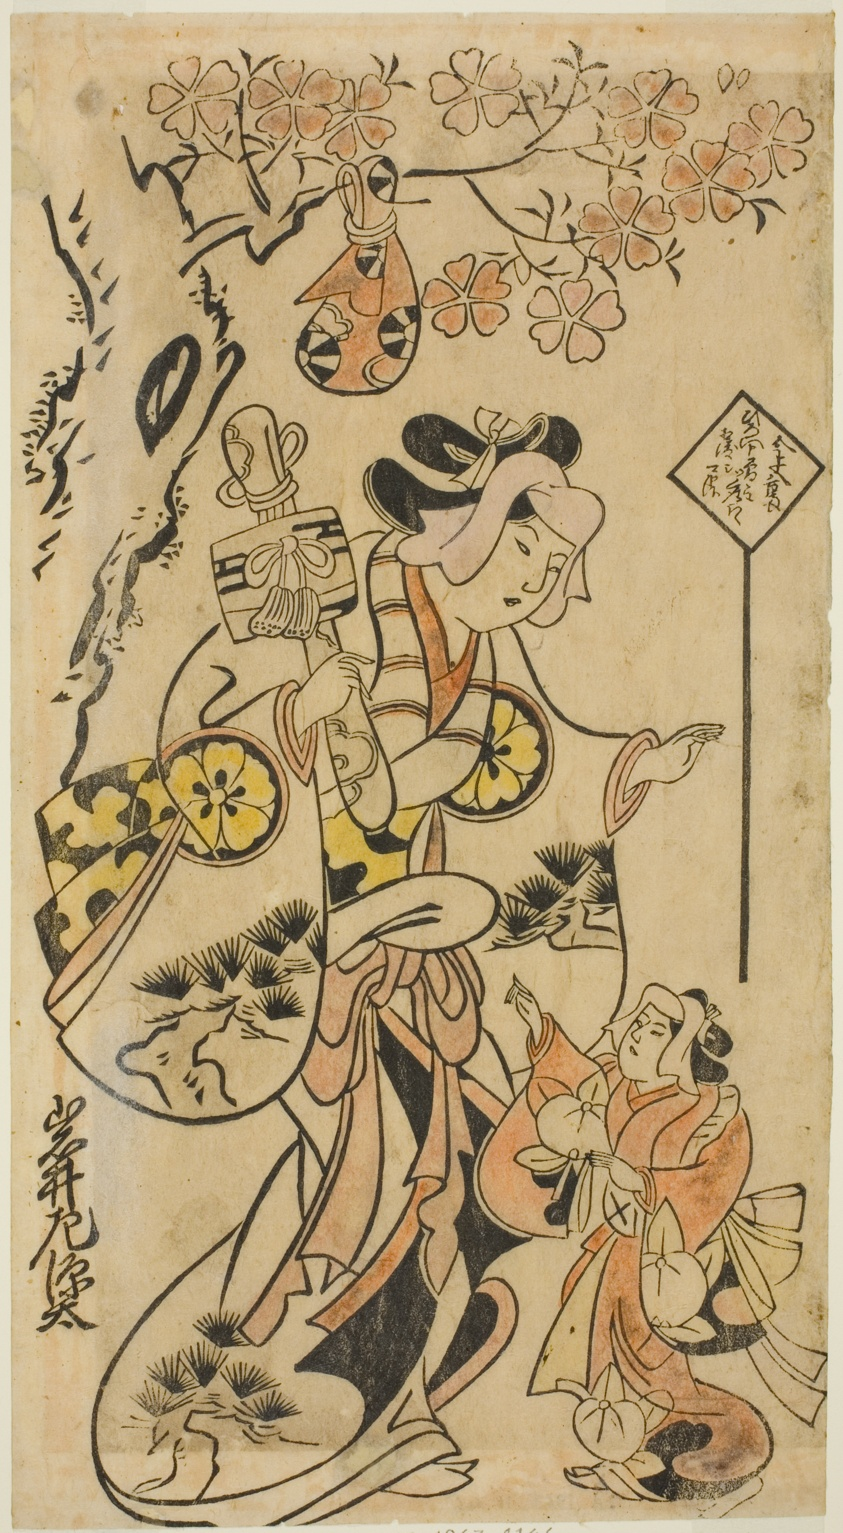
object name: Print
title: The Actor Iwai Sagenta I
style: Japanese (culture or style)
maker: Attributed to Torii Kiyonobu I; Japanese, 1664-1729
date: c. 1701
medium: Hand-colored woodblock print; hosoban, tan-e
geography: Japan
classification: woodblock print; print; asian art